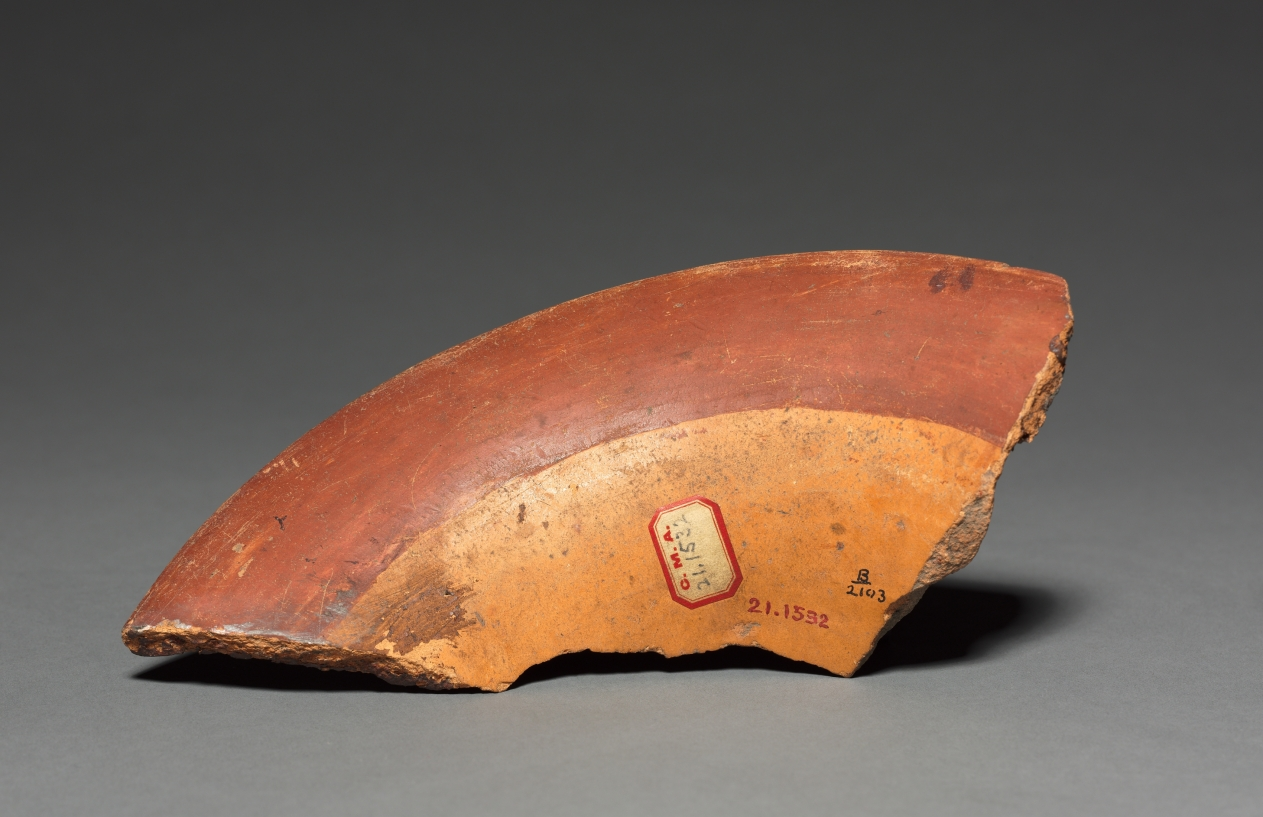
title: Jar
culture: Colombia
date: before 1550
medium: pottery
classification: Ceramic